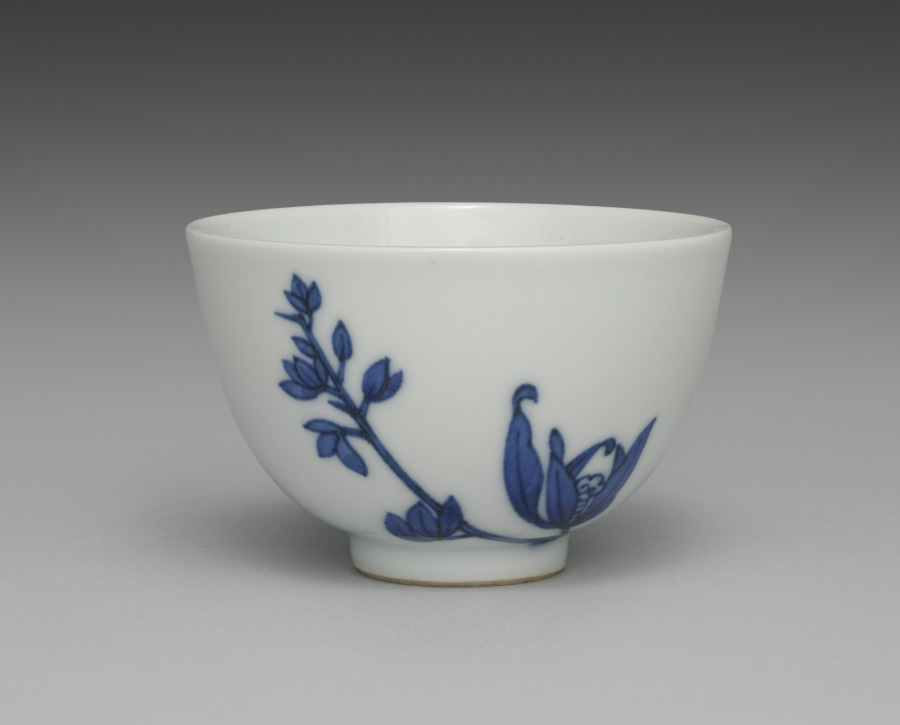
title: Teacup from Tea Set with Orchids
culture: Japan, Meiji period (1868–1912)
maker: Seifū Yohei III (Japanese, 1851–1914)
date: c. 1893–1914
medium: Porcelain with underglaze blue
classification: Ceramic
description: Although the teapot here is stored in a separate box from the five cups, these six pieces may once have been part of a tea set that included other tools such as a water cooler. The teacups have orchid flowers on both sides in underglaze blue, as well as a blue band inside the footring. The teapot has the same design and a blue band painted around the bottom of the lid’s knob. The cups’ long wood storage box is stamped on the exterior, over the lid and base, with a small red seal reading “Satō.” The same seal appears on five small squares of yellow textile, one placed in the bottom of each compartment in the teacup storage box. These are additional to the customary yellow cloths stamped with a “Seifu” seal. Interestingly, four of the Seifū cloths are stamped with an ovoid seal, while the remaining cloth, which is a slightly lighter color, has an unusual seal that is not quite gourd-shaped and with the fū of Seifū in a stylized, unrecognizable form. The teapot has its own box with a Satō seal and is wrapped with an orange textile stamped with the same unusual Seifū seal. A set with a very similar surface design is in the Brooklyn Museum. The Brooklyn set has a water cooler and a small pitcher, in addition to the teapot and cups, and all are in a single storage box. This box records the tea tools as made with kanpakuji, or “bright-jewel white porcelain,” counted among Yohei III’s most important inventions, and carved images. In fact, both sets have a white surface much closer in coloration to the cool white of porcelain clay used in Kyoto at the time, and the designs are simply painted. The Brooklyn set was thus likely mismatched at some point with a box intended for another tea set. Nonetheless, the box may have helped prevent the set’s original components from being dispersed, and the set itself provides insight into how the other tools from the present set may have looked.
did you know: This tea set with orchids has a side-handled pot called a kyūsu, used for steeping, straining, and serving tea.